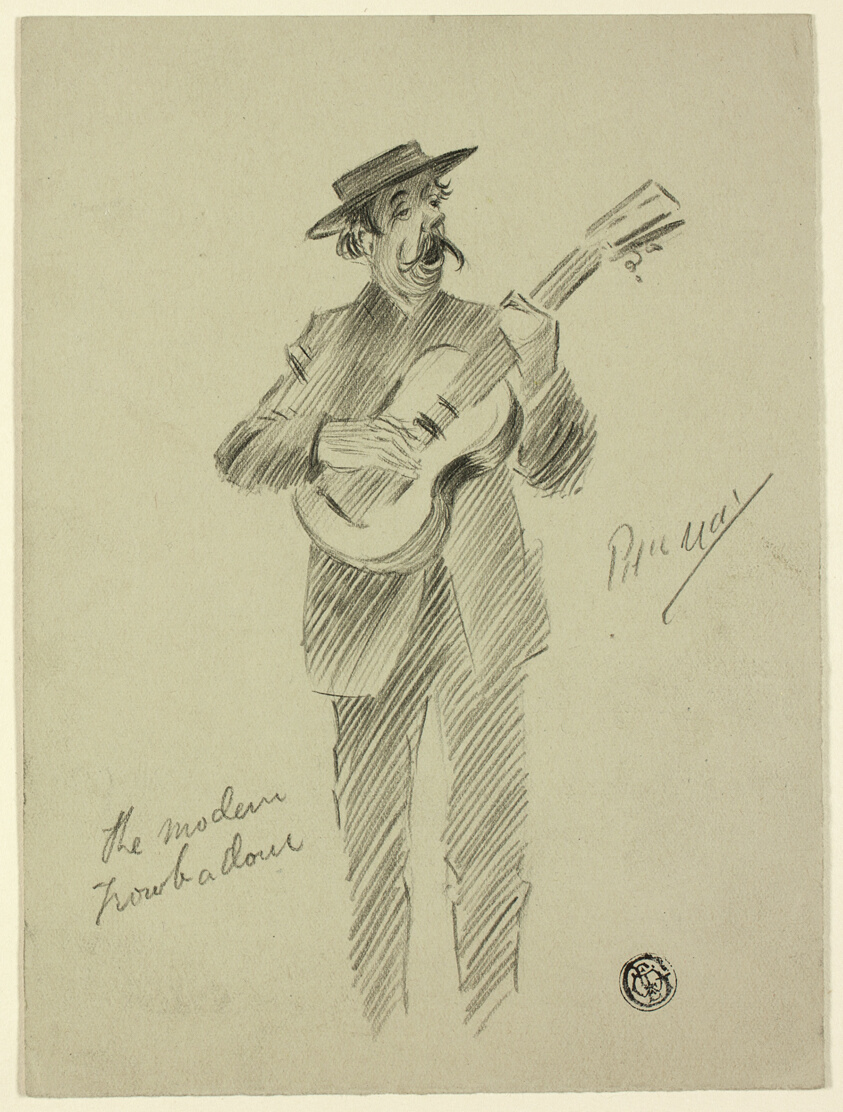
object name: Drawing and Watercolor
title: Drunken Man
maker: Philipp William May; English, 1864-1903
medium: Black crayon and graphite on gray wove paper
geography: England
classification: crayon; drawings (visual works); prints and drawing